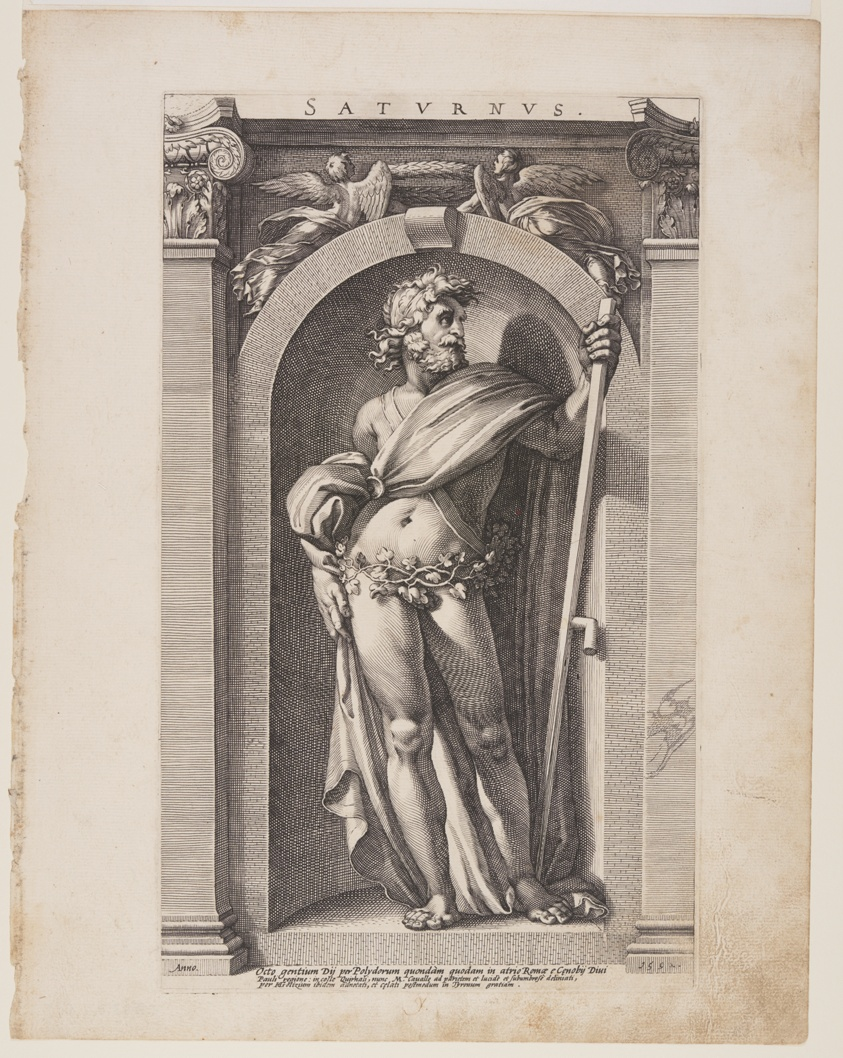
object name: Print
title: Saturnus (Saturn), from Eight Pagan Gods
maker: Hendrick Goltzius (Dutch, 1558–1617); after Polidoro da Caravaggio (Italian, c. 1499–c. 1543)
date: 1592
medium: Engraving on ivory laid paper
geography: Netherlands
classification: print; paper; prints and drawing; engraving